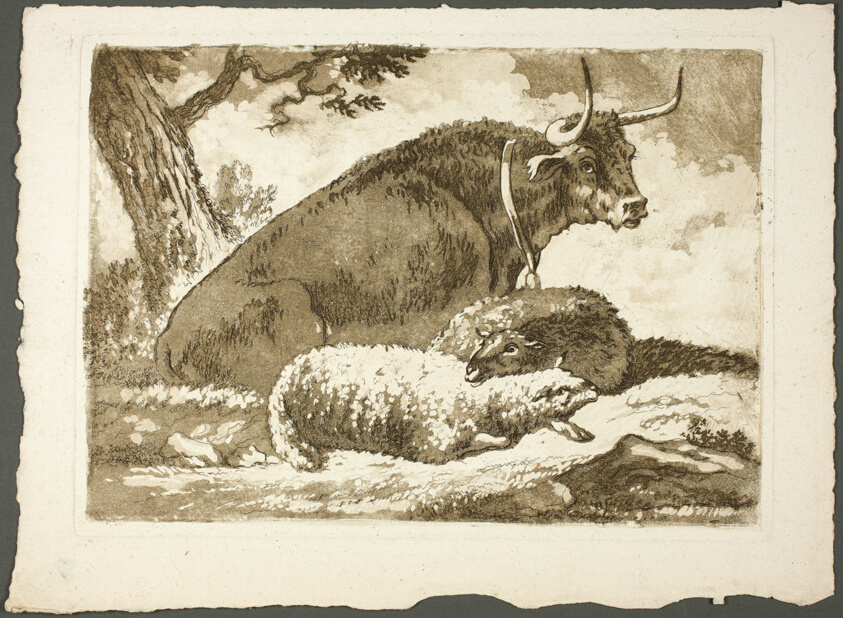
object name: Print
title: A Bull and Two Sheep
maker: Pierre Lelu (French, 1741-1810)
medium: Etching and aquatint on ivory wove paper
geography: France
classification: etching; print; prints and drawing